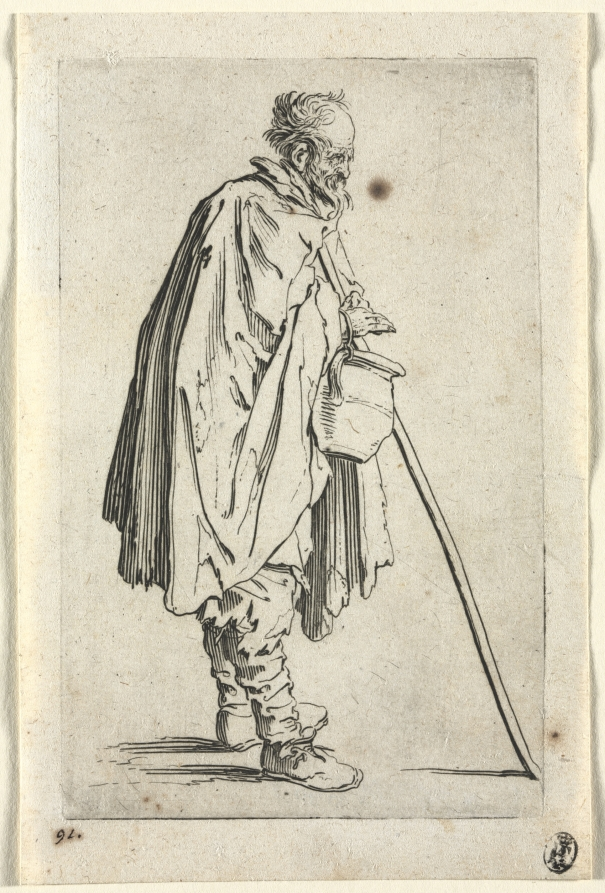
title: The Beggars: Beggar with Pot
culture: France, 17th century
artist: Jacques Callot (French, 1592–1635)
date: c. 1623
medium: etching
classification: Print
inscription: Inscribed lower left in pen and brown ink: "91."